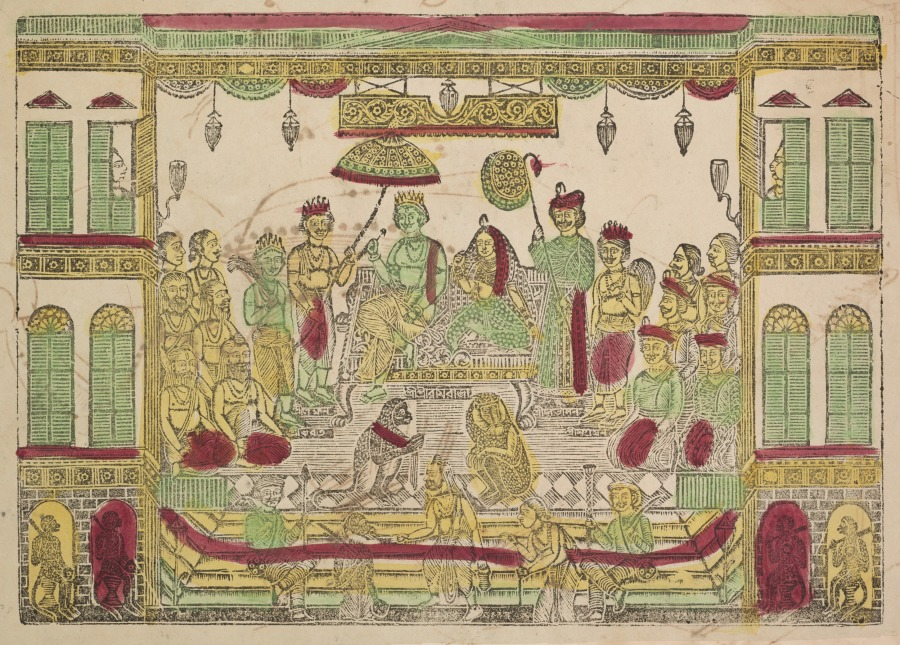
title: Rama and Sita in the royal palace (recto), from a Kalighat album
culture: Eastern India, Bengal, Kolkata, Kalighat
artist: Shri Gobinda Chandra Roy (Indian, active late 1800s)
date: c. 1890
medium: Woodcut, hand colored with gum tempera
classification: Print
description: The finale of the Ramayana presents Rama and Sita enthroned as the rightful rulers of the kingdom of Ayodhya. They are surrounded by Rama’s brothers, their loyal monkey allies, sages, and nobles. The balanced, symmetrical composition evokes the peace and stability that Rama’s millennia-long reign will bring to the kingdom. The artist has anachronistically set the scene in an 1800s Calcutta mansion, complete with glass sconces and lamps hanging from the ceiling. Since Calcutta (now Kolkata) was the epicenter of British colonial power, this imagery suggests a desire to reinstate Hindu rulership over India.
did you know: Rama's devoted monkey followers Hanuman and Sugriva are seated before the throne.